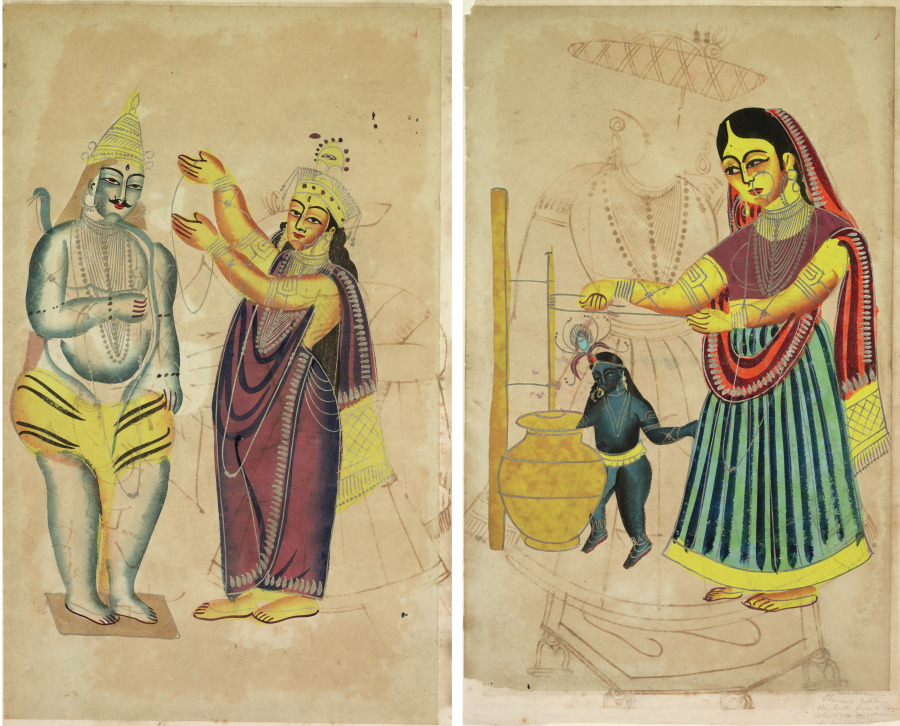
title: Leaf from a Kalighat album: Parvati Placing a Wedding Garland on Shiva (recto); Yasoda Churning Butter (verso)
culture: Eastern India, Bengal, Kolkata, Kalighat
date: c. 1890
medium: Gum tempera, graphite, ink, and tin on paper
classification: Painting